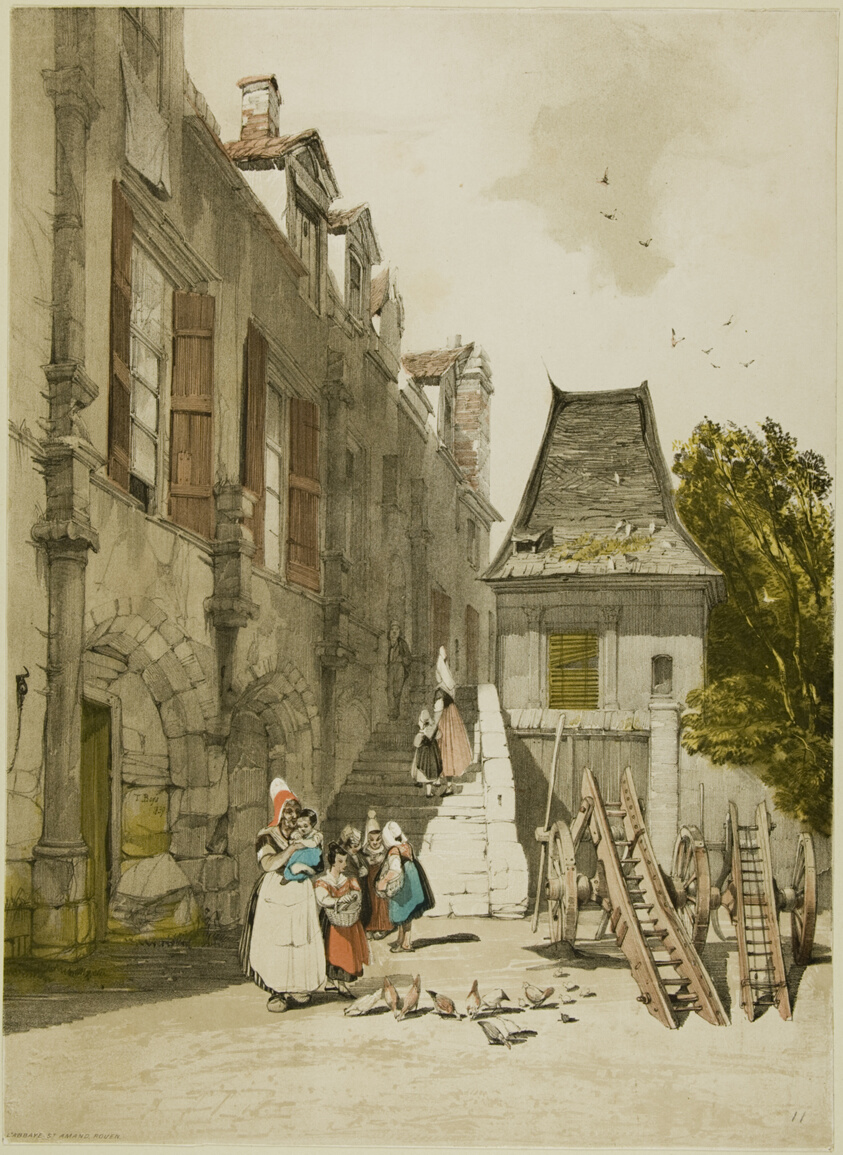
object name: Print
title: L'Abaye St. Amand, Rouen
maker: Thomas Shotter Boys (English, 1803-1874); published by Charles Joseph Hullmandel (English, 1789-1850)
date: 1839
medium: Color lithograph on paper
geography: England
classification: lithograph; print; prints and drawing